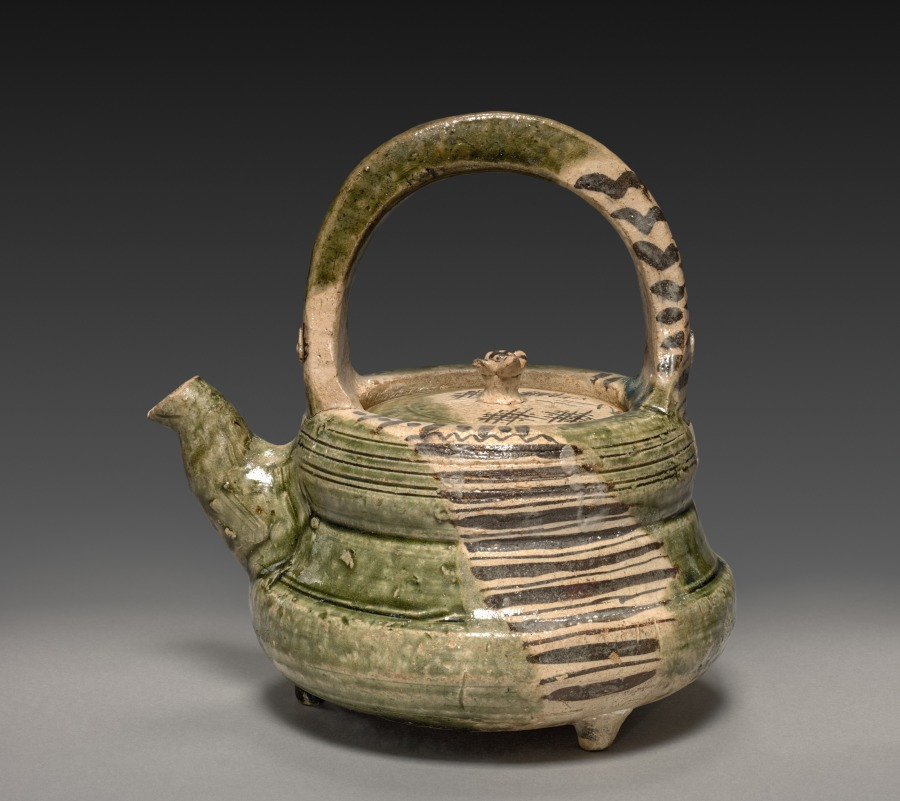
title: Ewer (Suichū)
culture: Japan, Momoyama period (1573–1615)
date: early 1600s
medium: Glazed stoneware with iron oxide underglaze slip (Mino ware, Oribe type)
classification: Ceramic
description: This ewer was made to replenish the jar that holds water for rinsing teabowls and filling the iron kettle at tea gatherings. Highly abstracted pine trees, cascading ivy, stripes, and grids make up the designs in underglaze iron oxide, while the overall surface alternates between a transparent glaze and a green glaze characteristic of some Oribe tea wares.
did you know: Oribe wares are named for the tea master Furuta Oribe, who initiated the flamboyant designs that characterize them.